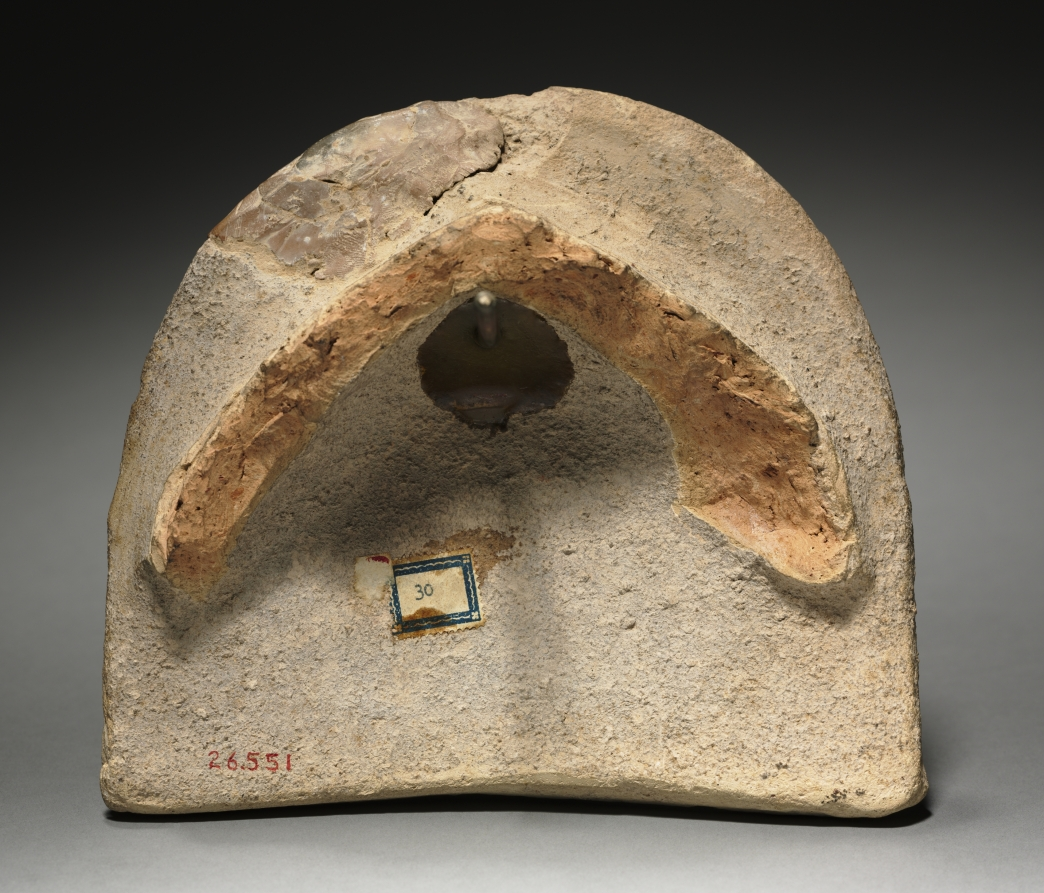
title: Antefix with Satyr Face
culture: Italy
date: 425–350 BCE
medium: terracotta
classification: Sculpture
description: This antefix would have been one of a series of identical tiles that decorated the edge of a roof. Ancient Greek antefixes were often stylized as mythological creatures such as gorgons or satyrs. This antefix represents the latter, showing the pointed ears and wild beard of a satyr, a nature spirit associated with ribaldry and festivals.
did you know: This antefix, a decorative roof tile, still retains some of its original pigment.